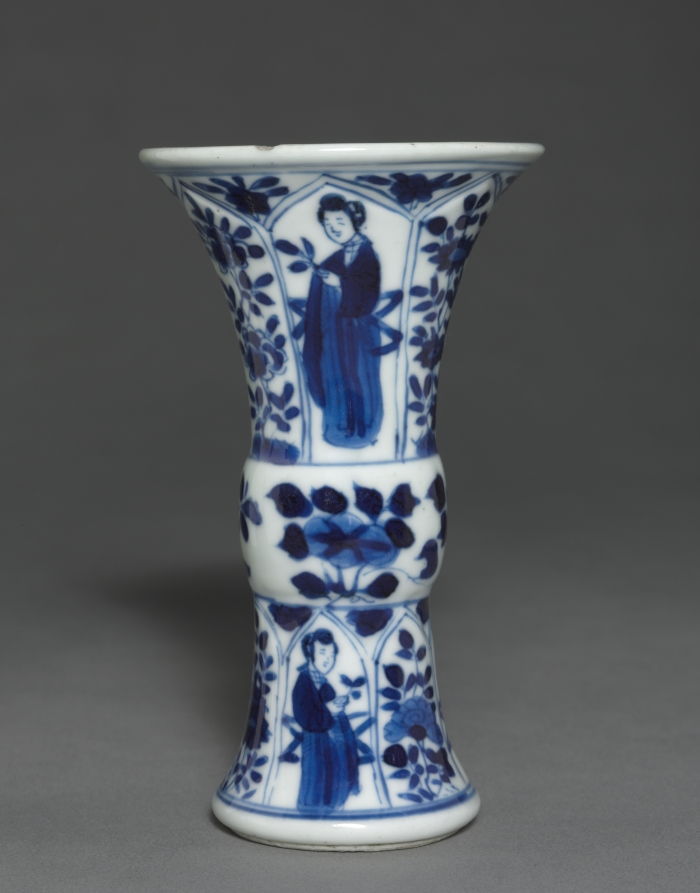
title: Beaker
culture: China, Qing dynasty (1644-1911), Daoguang reign (1821-1850) - Xianfeng reign (1851-1861)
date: 19th Century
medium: porcelain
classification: Ceramic